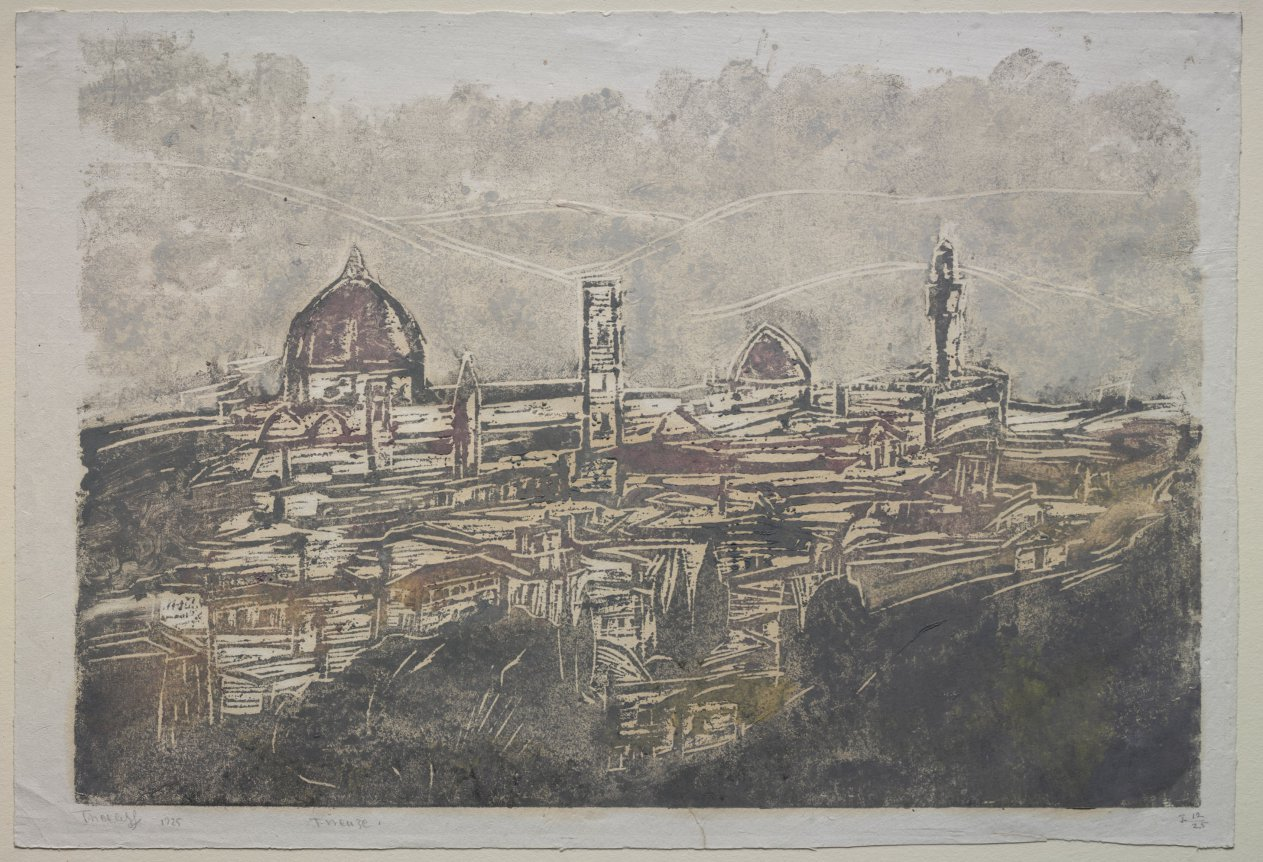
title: View of Florence, Italy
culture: Finland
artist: Ellen Thesleff (Finnish, 1869–1954)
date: 1925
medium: color woodcut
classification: Print